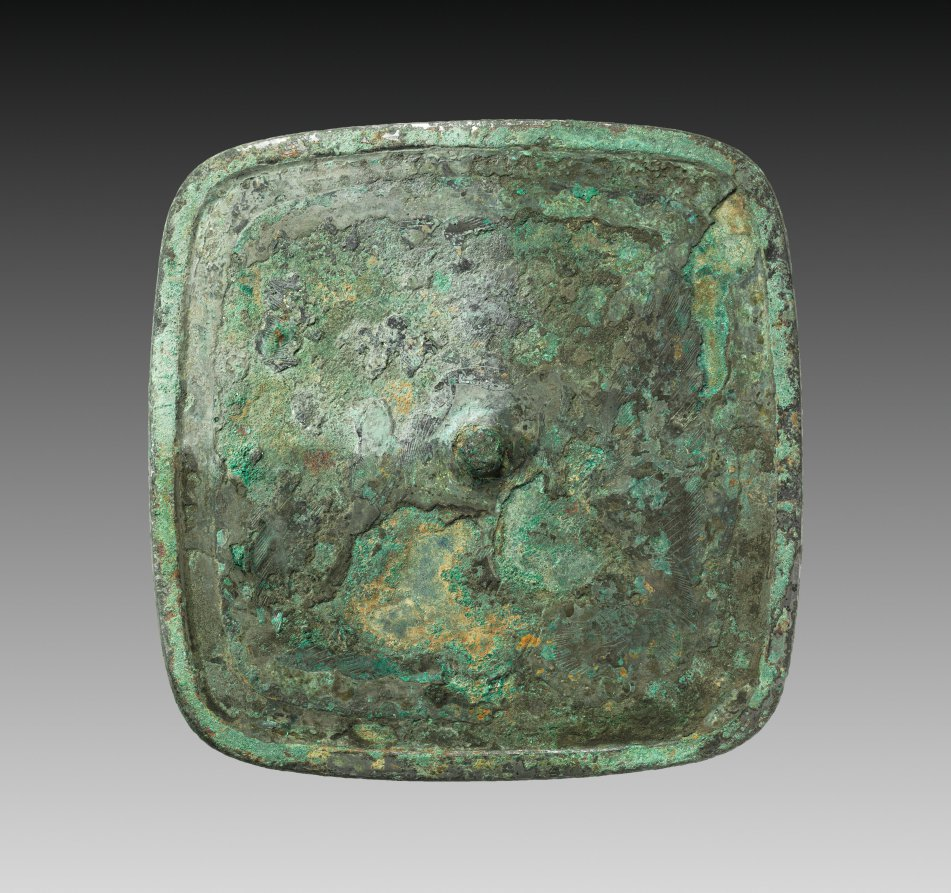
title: Mirror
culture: China, Tang dynasty (618-907)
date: 618–907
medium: bronze with silver inlay in lacquer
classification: Metalwork